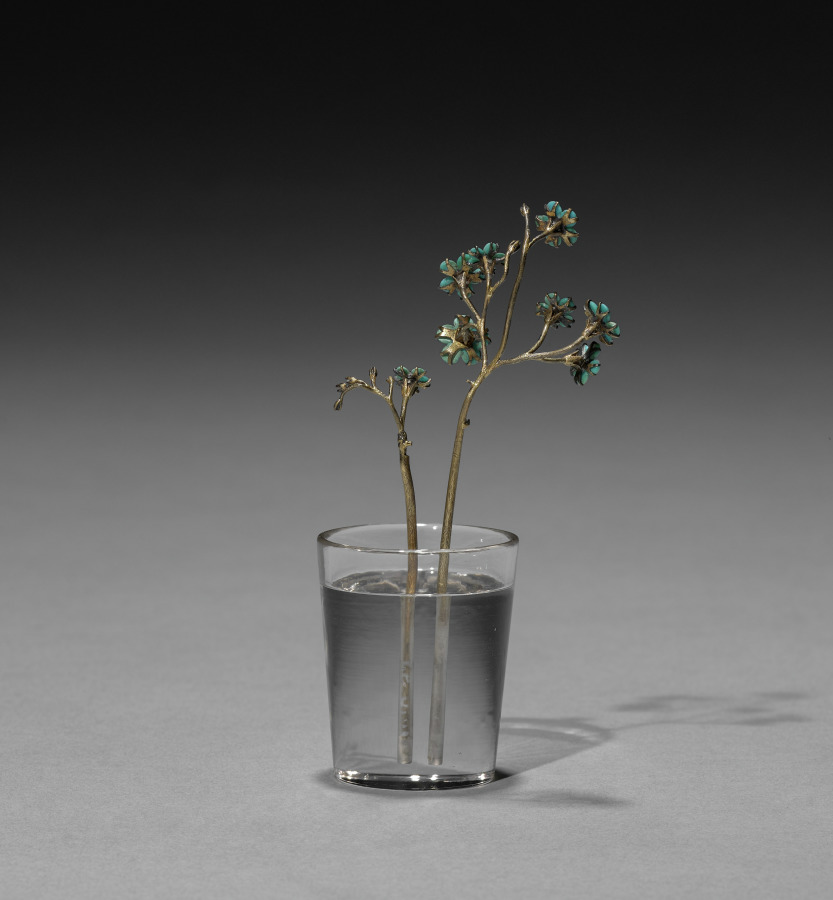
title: Flower Study of Forget-Me-Nots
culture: Russia, St. Petersburg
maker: House of Fabergé (Russian, 1842–1918)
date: c. 1885–1915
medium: turquoise, diamonds, rock crystal, silver gilt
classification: Miscellaneous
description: These delicate flowers, resembling a bouquet of forget-me-nots, are composed of finely rounded turquoise stones set around rose-cut diamonds on silver-gilt stems placed in rock crystal pots. Fabergé’s inspiration for his flower studies is said to have come from the floral brooches of precious stones that were made in the 1700s for Catherine the Great as well as from the Japanese art of flower arranging, known as ikebana. Fabergé’s flower studies were given as intimate gifts to friends by the tsarina and others in the court. She also liked to take them around to wherever the imperial family was residing as a reminder of spring during the harsh Russian winters.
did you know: The stems of Fabergé’s flower studies are set into little basins carved from rock crystal to resemble pots of water.